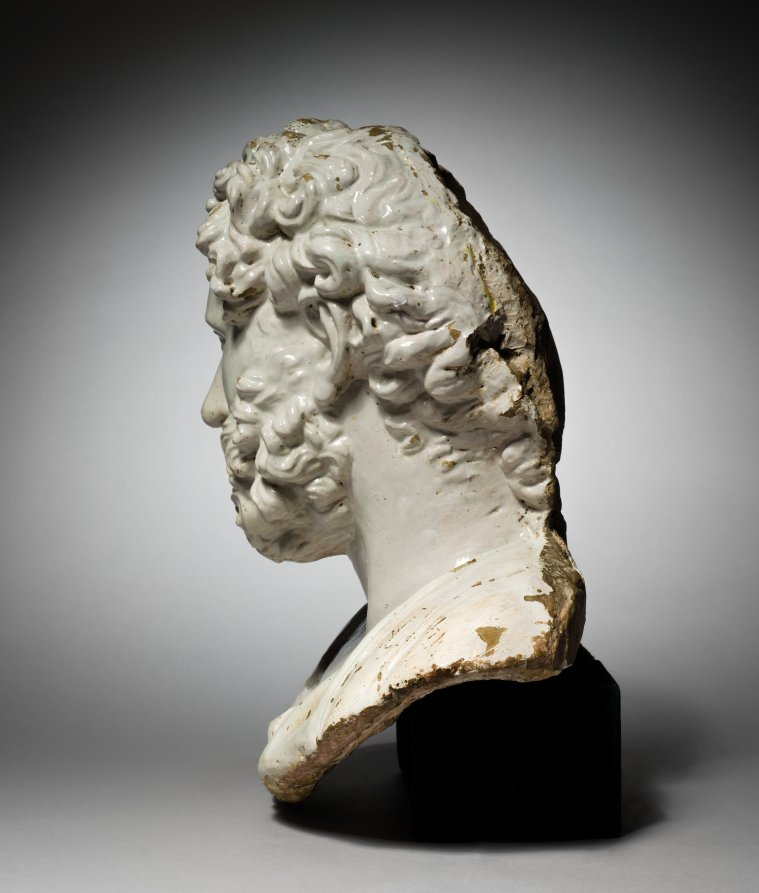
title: Bust of a Classical Hero or Emperor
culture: Italy, 16th century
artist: Girolamo della Robbia (Italian, 1488–1566)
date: early to mid 16th century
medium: glazed terracotta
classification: Sculpture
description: This bust most likely represents an emperor or condottiere from classical antiquity, and probably formed part of a series of classical heads. Such groups of worthies were featured as decorative schemes in the studioli and architectural projects of Renaissance statesmen. Attesting to the sophistication of their learned patrons, these busts also provided the opportunity for artists to explore the contemporary stylistic relevance of classical portraiture—a source of fascination and inspiration for Florentine sculptors of this period.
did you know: Head-and-shoulders portraits, known as busts, were popular from Roman times.